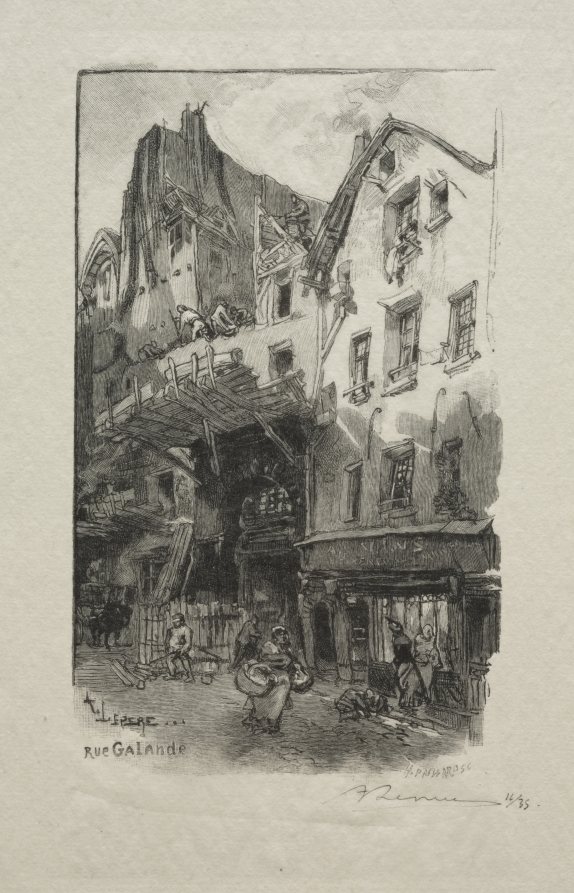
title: Rue Galande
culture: France, 19th-20th century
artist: Auguste Louis Lepère (French, 1849–1918)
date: c. 1870–1918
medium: wood engraving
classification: Print